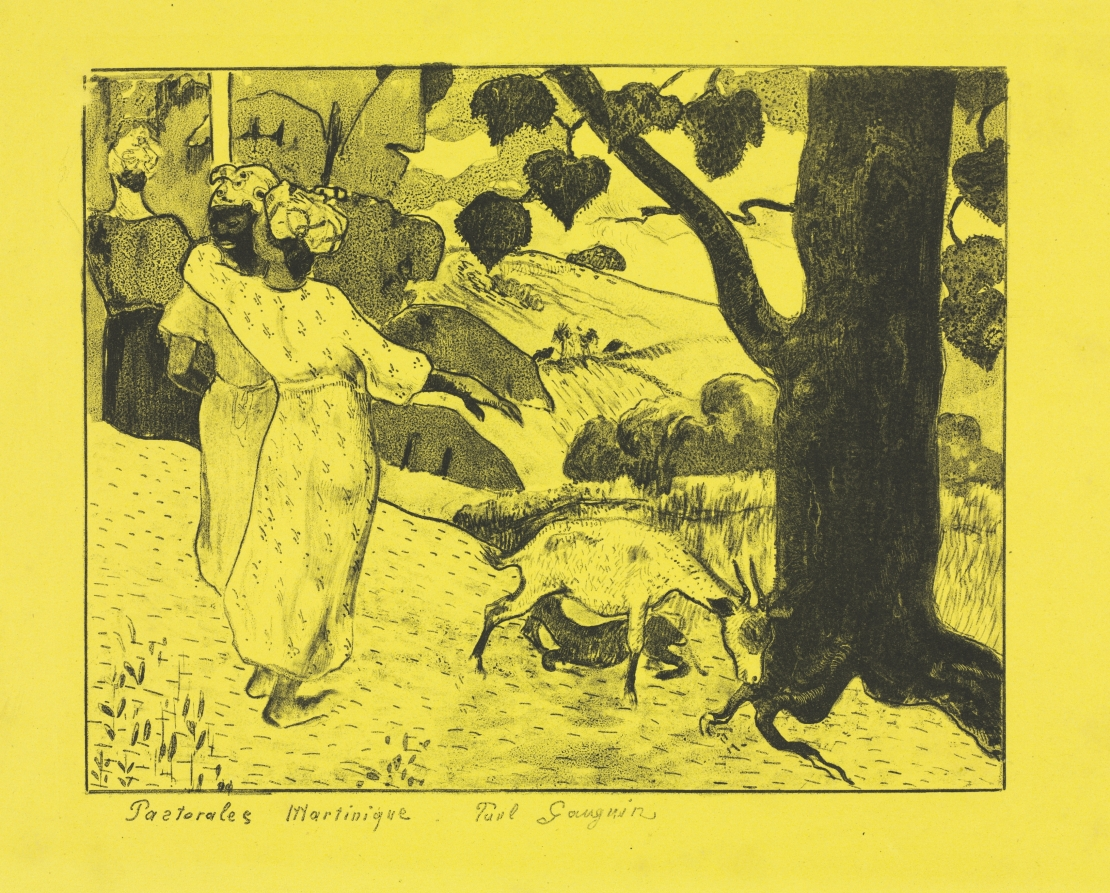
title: Volpini Suite: Martinique Pastoral (Pastorales Martinique)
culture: France, 19th century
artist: Paul Gauguin (French, 1848–1903)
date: 1889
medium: zincograph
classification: Print